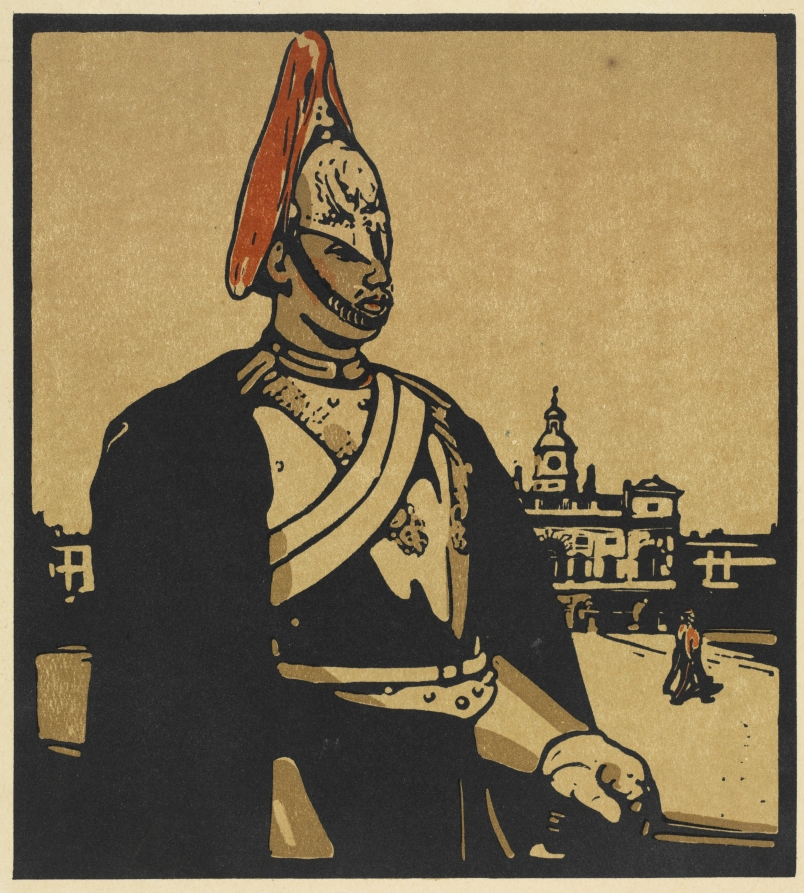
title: London Types: Guardsman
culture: England, 19th century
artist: William Nicholson (British, 1872–1949)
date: 1898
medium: color lithograph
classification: Print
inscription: Lower right margin, in pencil (not artist's hand): "Guardsman 1898."